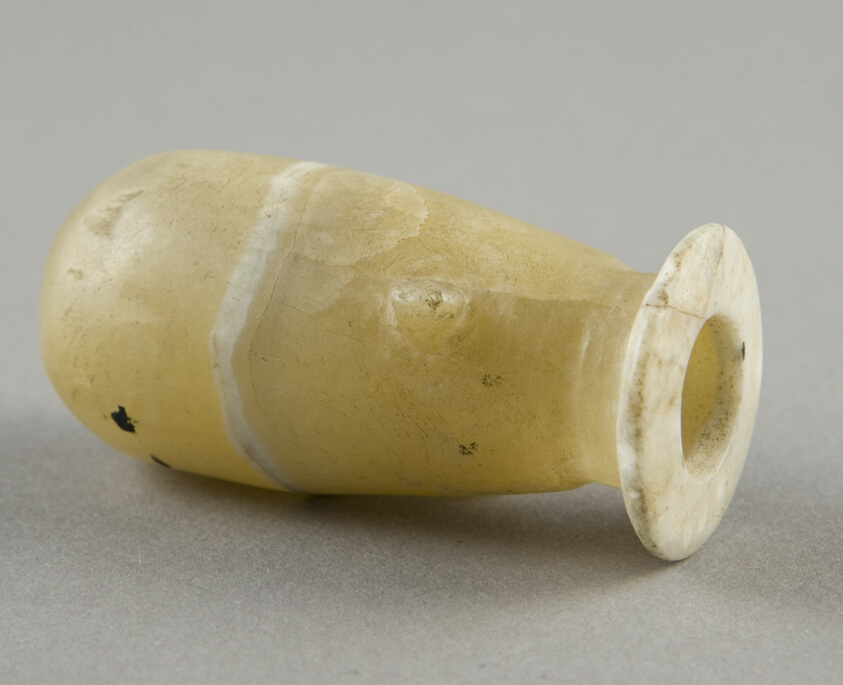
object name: Vessel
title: Alabastron (Container for Scented Oil)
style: egyptian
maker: Egyptian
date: 7th century BCE/1st century CE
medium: Alabaster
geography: Egypt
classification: alabastron; stone; vessel; ancient art